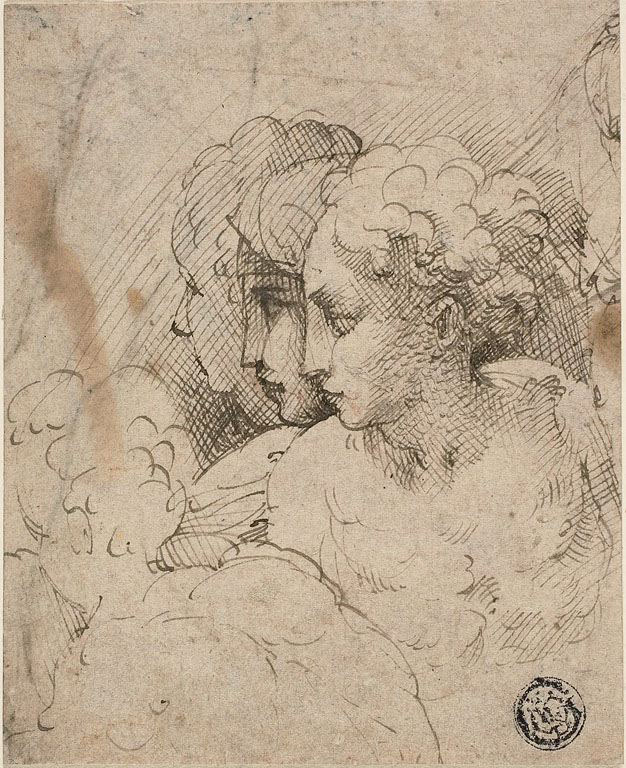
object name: Drawing and Watercolor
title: Female Heads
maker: Attributed to Parmigianino; Italian, 1503-1540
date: 1535/40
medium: Pen and brown ink with traces of black chalk, on buff laid paper, laid down on ivory laid paper, tipped onto board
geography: Italy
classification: pen and ink drawings; drawings (visual works); prints and drawing